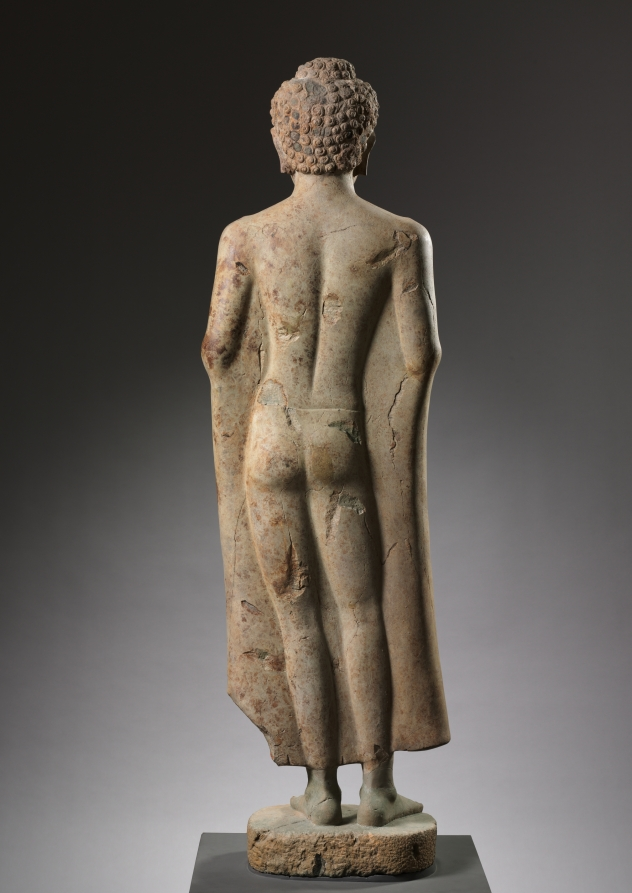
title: Buddha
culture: Thailand, probably Shri Thep, Mon-Dvaravati style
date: 600s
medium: sandstone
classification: Sculpture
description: This elegant, monumental sculpture is the earliest type of Buddha image to be made in Southeast Asia. It comes from a site in north-central Thailand that was part of the Dvaravati kingdom (500s–1200s). The body shows direct links with the sculptural traditions at Sarnath in northern India on the banks of the Ganges River. The expression of the face has the peaceful introspection that became canonical during the Gupta period of the 5th century in India. The shape of the head and facial features—unlike Indian precursors—suggest that the artists and patrons of Dvaravati made the Buddha resemble the local Mon population. The figure's stance has been rendered with remarkable fluidity, and the abstracted caps of the knees and minimalist modeling of the pelvis lend the figure an otherworldly, transcendent demeanor, balanced by the approachable smiling countenance.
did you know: Now reunited for display, CMA acquired the sculpture in two pieces, when the feet (CMA 1974.91) and the body were found in separate locations.